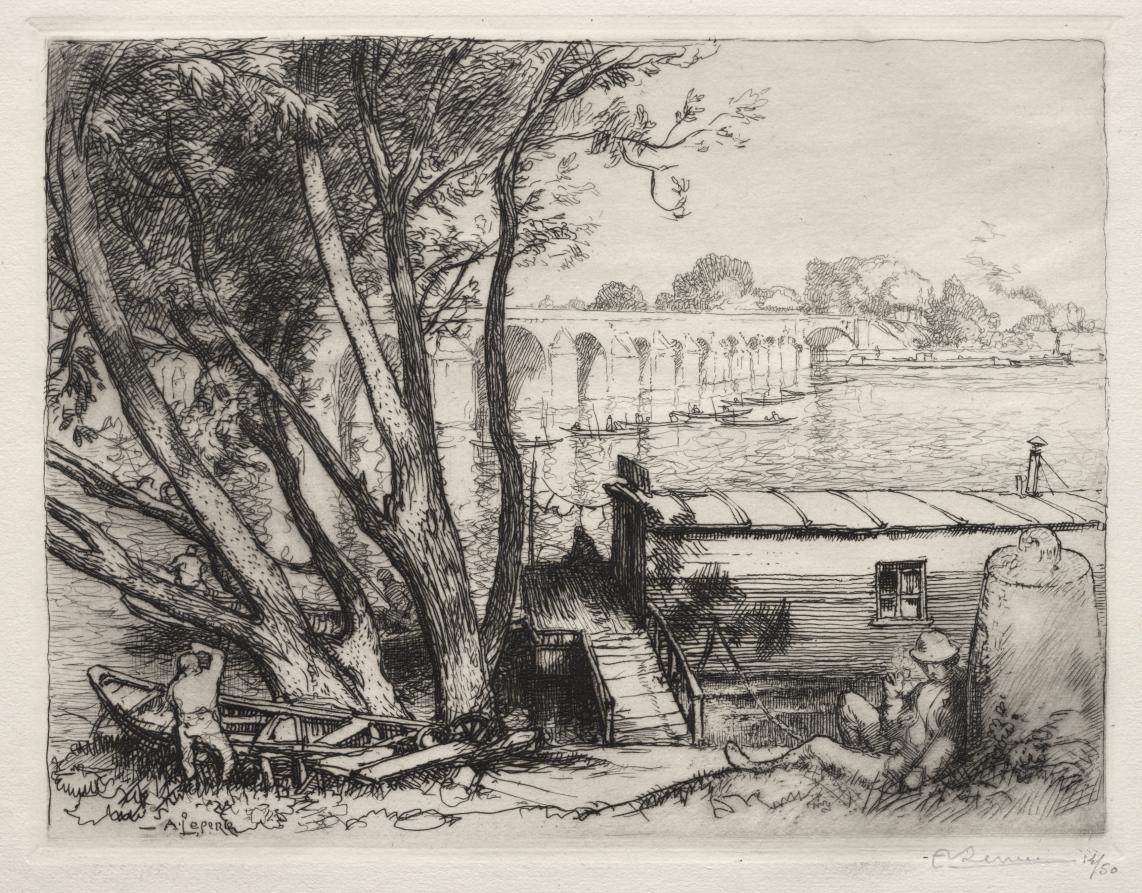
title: Le Pont de Poissy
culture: France, 20th century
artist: Auguste Louis Lepère (French, 1849–1918)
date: 1917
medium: etching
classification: Print